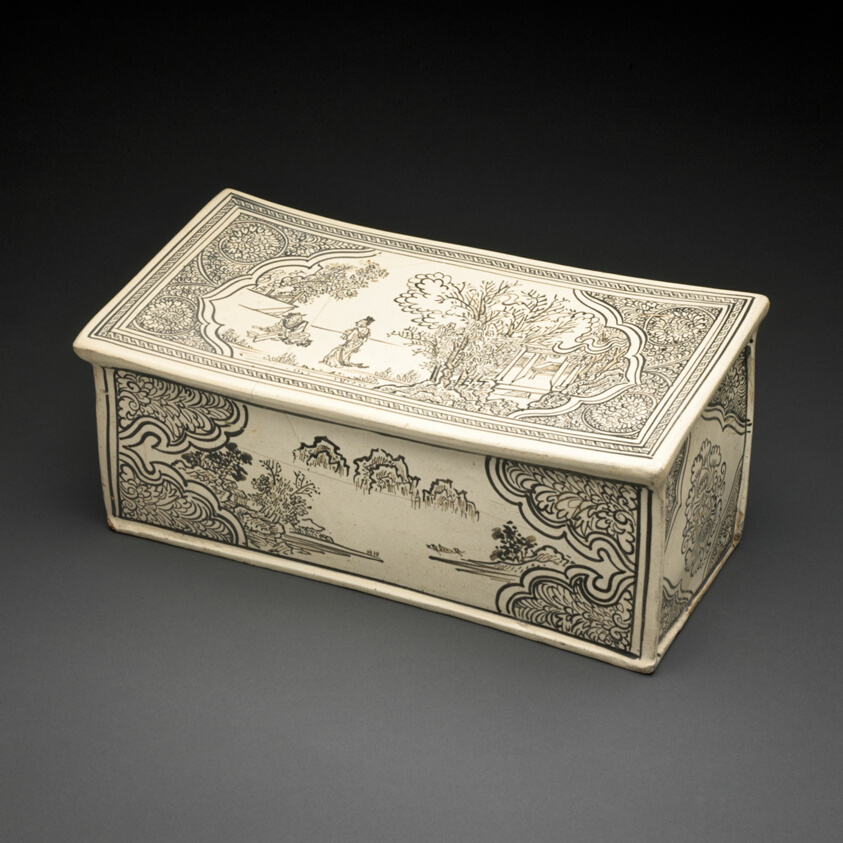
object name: Decorative Arts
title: Rectangular Pillow with Figural and Landscape Scenes, Double-Lotus Medallions, and (back) Tiger Seated by Trees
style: Chinese (culture or style)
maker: China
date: Jin dynasty (1115–1234), 13th century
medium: Cizhou ware; stoneware, slip-coated and painted in underglaze iron brown slip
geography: China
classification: stoneware; asian art; ceramics; decorative arts